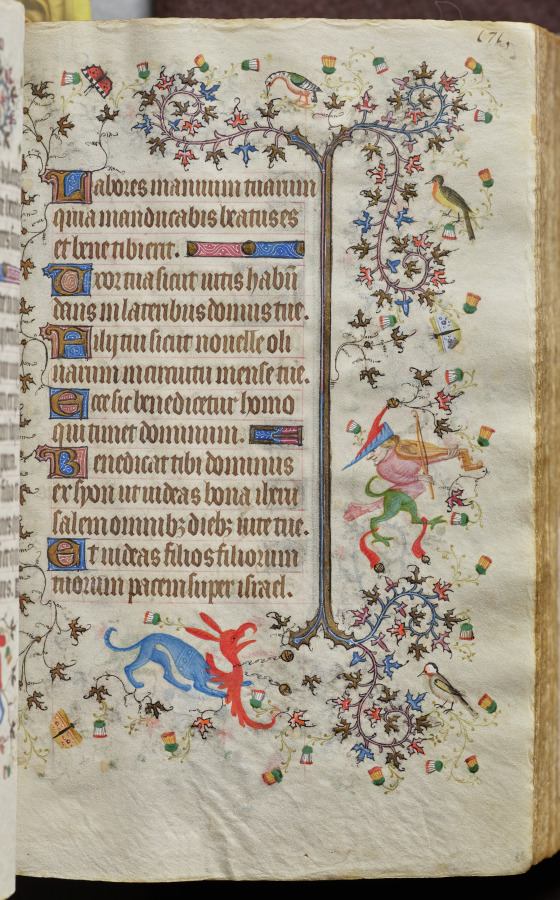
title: Hours of Charles the Noble, King of Navarre (1361-1425): fol. 86r, Text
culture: France, Paris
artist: Master of the Brussels Initials and Associates (French)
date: c. 1405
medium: ink, tempera, and gold on vellum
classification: Bound Volume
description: This precious volume was obviously highly prized by its owner, the French-born King of Navarre, who had his coat of arms painted on no less than twenty folios. Rather than directly commissioning this manuscript from a specific workshop, it seems that Charles the Noble acquired his book of hours -- perhaps ready-made for the luxury market -- while on a trip to Paris in 1404-05. A collaborative effort, six painting styles are evidenced within the pages of this codex, those of two Italians, two Frenchmen, and two Netherlanders. The painter who was responsible for the planning and decoration of the book, and who produced seventeen of the large miniatures, was a Bolognese artist known as the Master of the Brussels Initials. His principal assistant, responsible for most of the borders, was a Florentine who signed his name "Zecho" da Firenze on folio 208 verso.